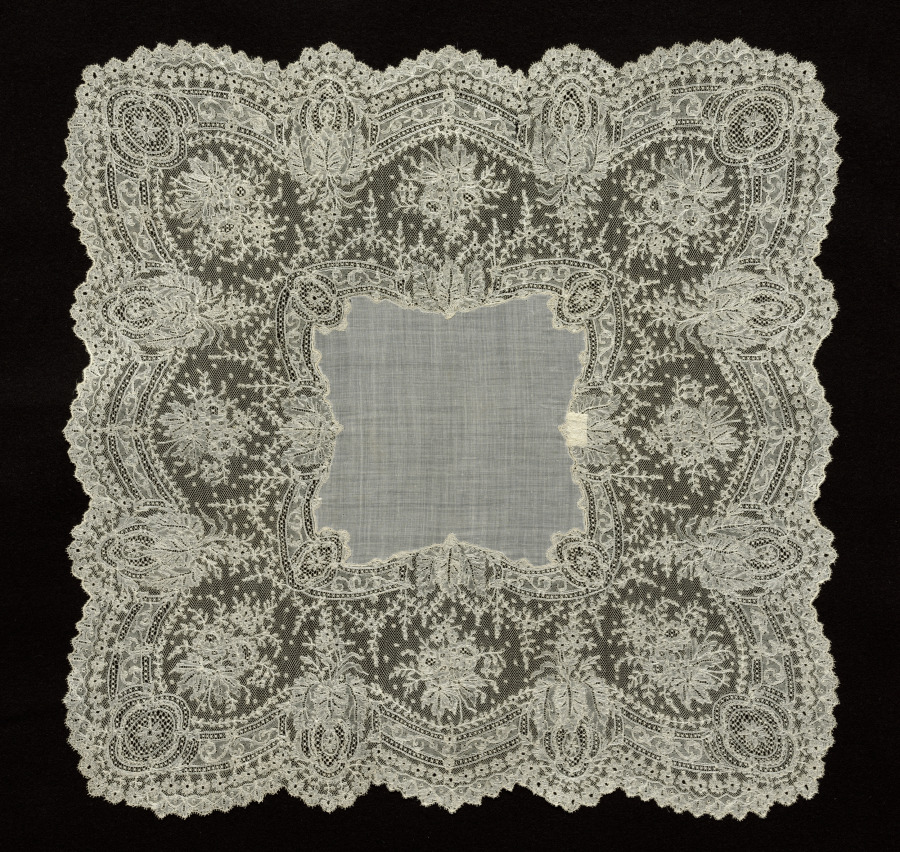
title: Lace Handkerchief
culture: Belgium, Mechelen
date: 1740–60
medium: Plain weave linen center with bobbin lace (Mechelen lace) border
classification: Lace